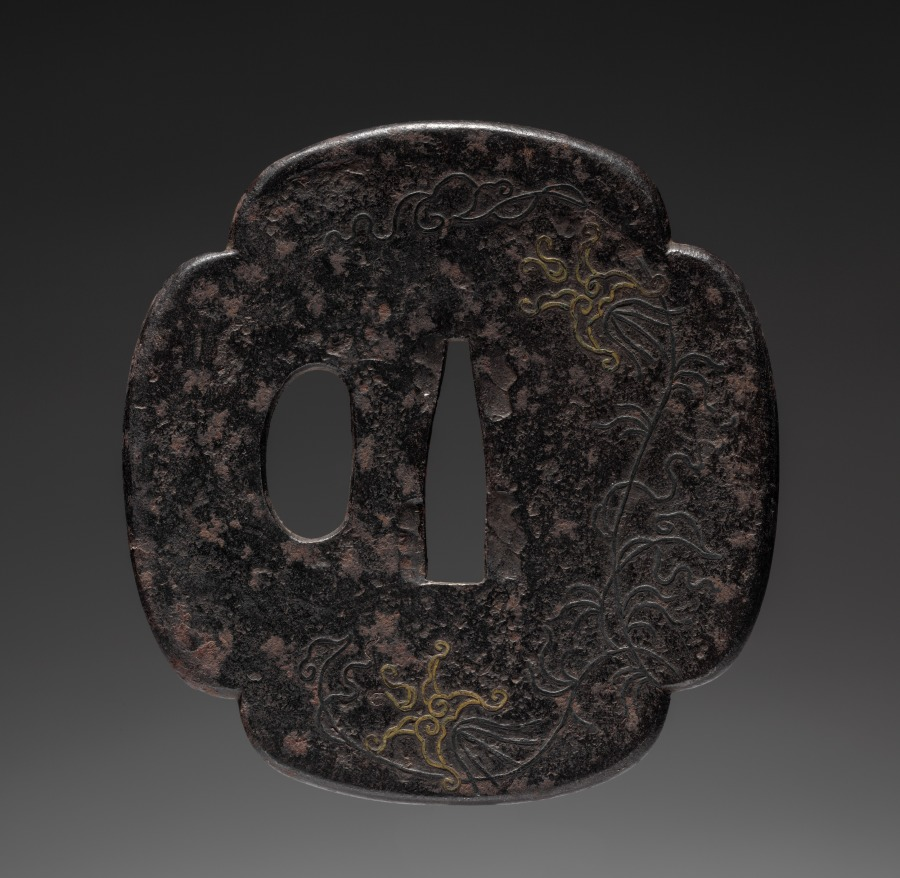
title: Sword Guard (Tsuba)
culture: Japan, possibly Edo period (1615-1868)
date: c. 1615–1868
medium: iron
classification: Arms and Armor